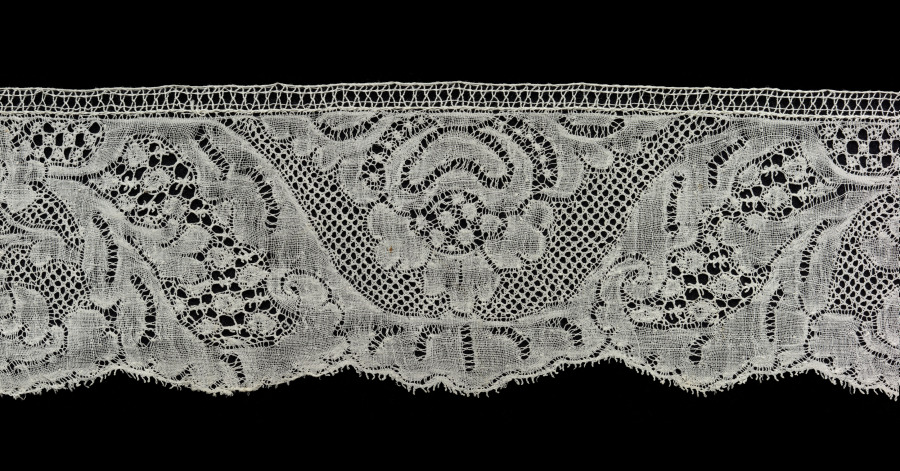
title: Lace Edging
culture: Belgium, Binche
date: 1700s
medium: Linen: bobbin lace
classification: Lace